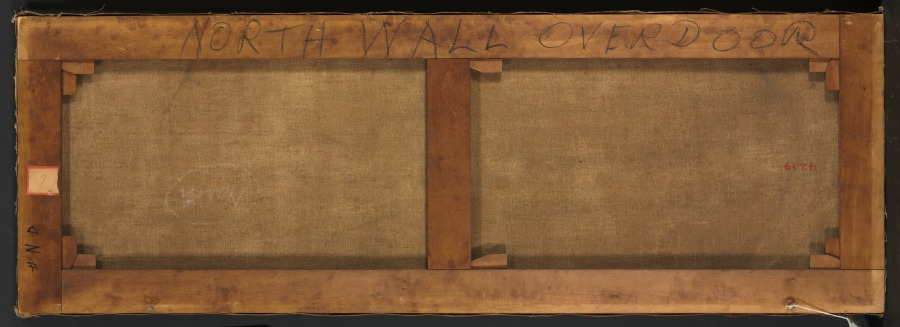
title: Overdoor Painting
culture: France, 18th century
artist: Pierre Rousseau (French, 1751–1829)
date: 1790s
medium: oil on canvas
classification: Painting